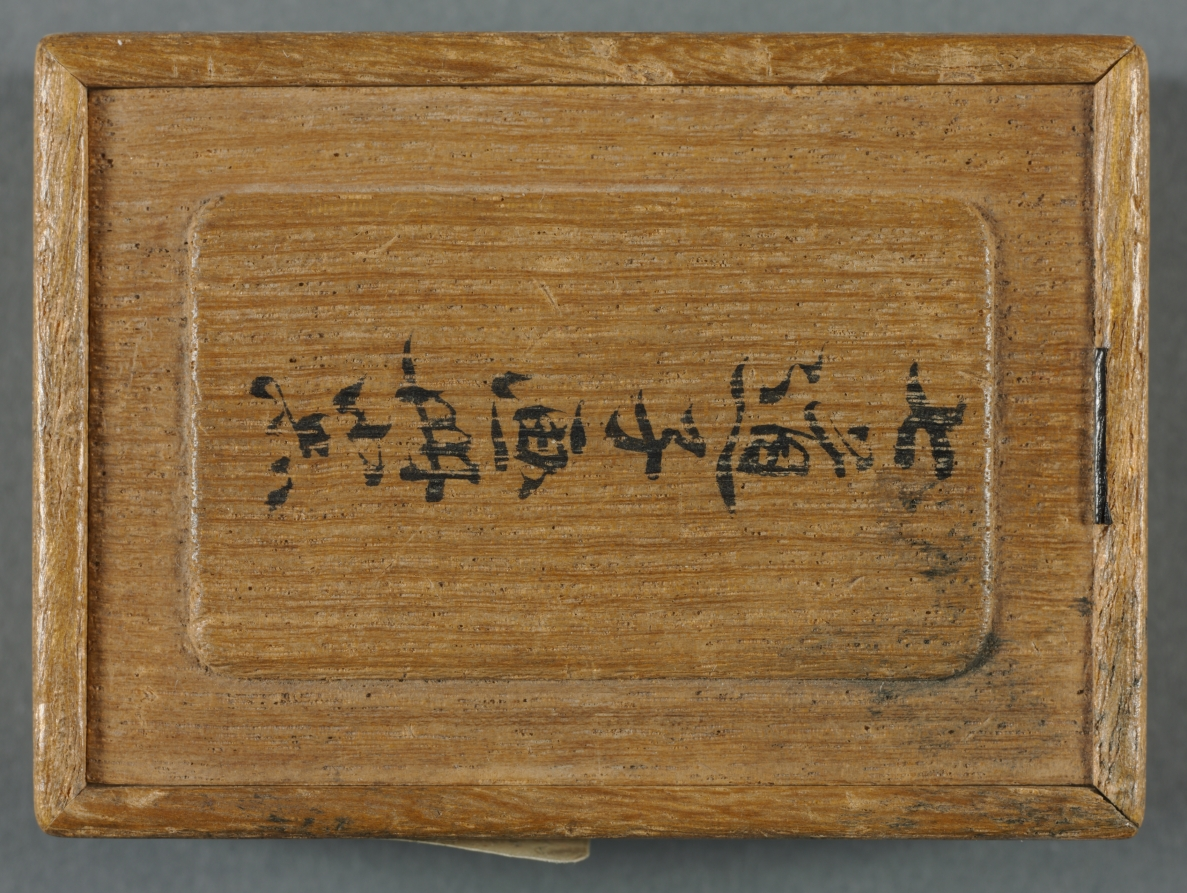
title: Miniature Album with Figures and Landscape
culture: China, Qing dynasty (1644–1911), Qianlong reign (1736–95)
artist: Zeng Yandong (Chinese, c. 1751–1827)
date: 1822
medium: Album of twelve leaves, ink and color on paper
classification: Painting